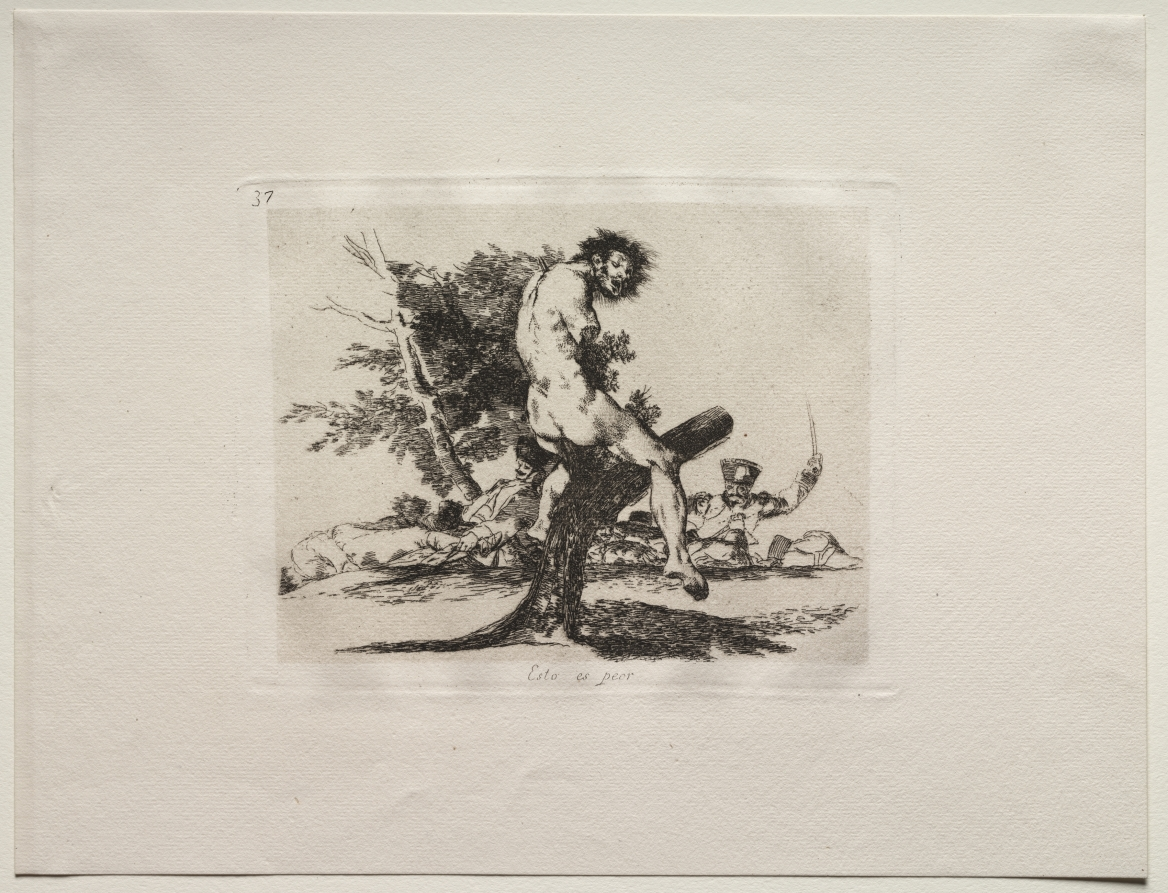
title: The Horrors of War: This Is Worse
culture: Spain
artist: Francisco de Goya (Spanish, 1746–1828)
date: c. 1810–20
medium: etching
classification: Print